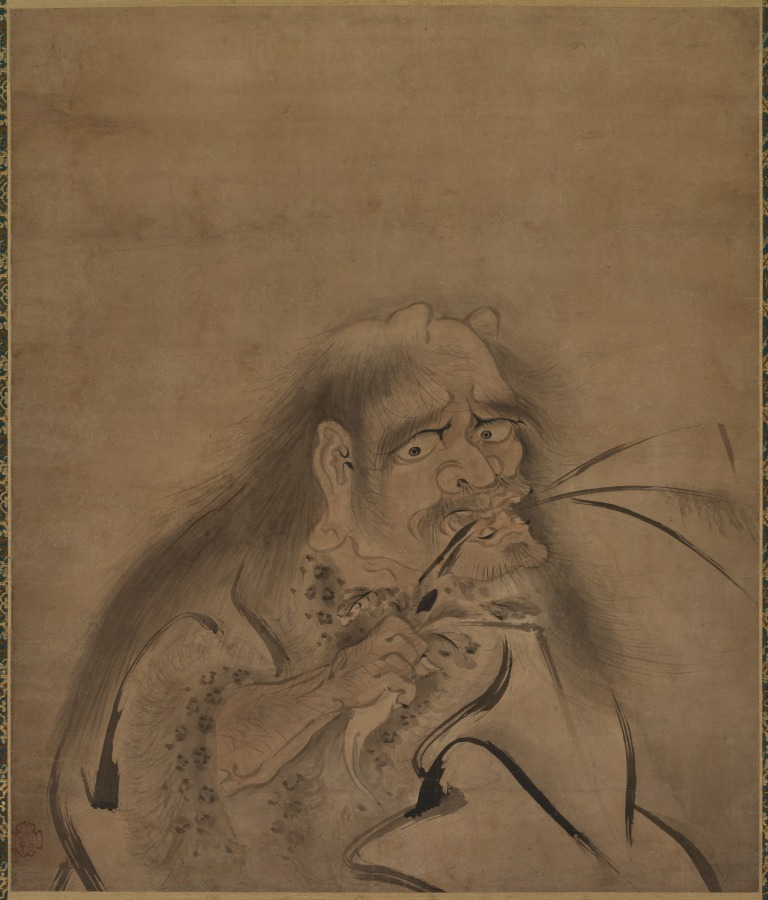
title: Shennong (Shinnō)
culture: Japan, Muromachi period (1392–1573)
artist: Shōryō (Japanese)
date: late 1400s–early 1500s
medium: hanging scroll; ink on paper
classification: Painting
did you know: Shennong legendarily taught people how to farm and also how to use plants as medicine.